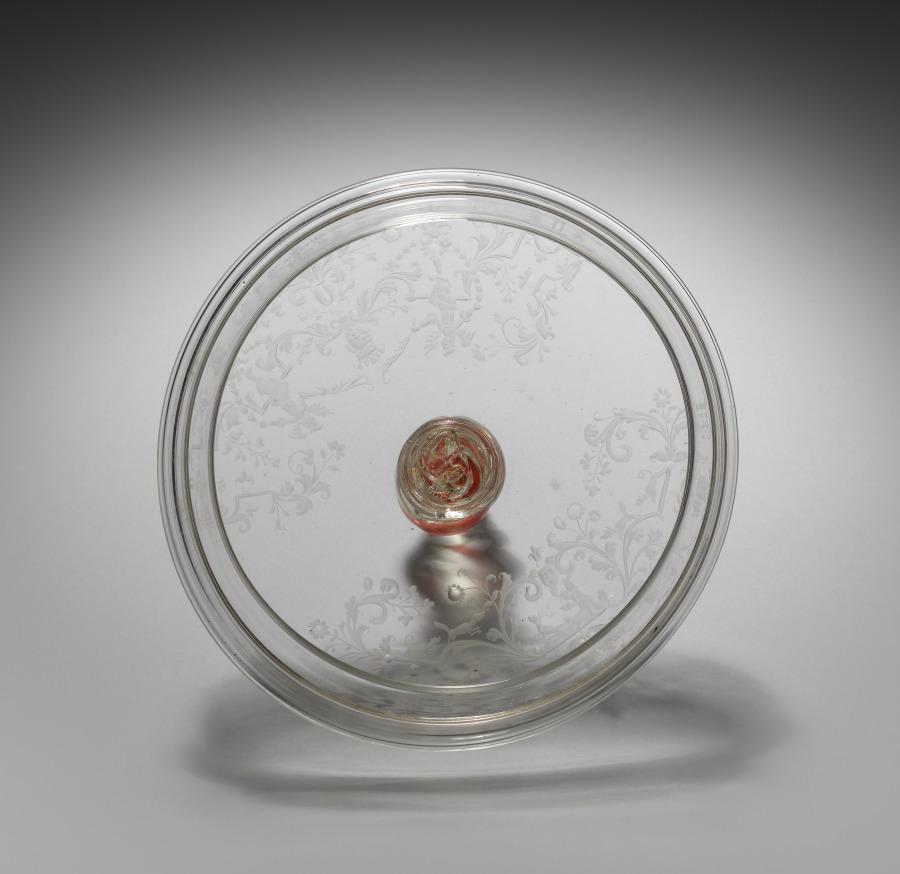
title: Cover for a Standing Cup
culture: Bohemia, 18th century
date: c. 1715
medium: glass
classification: Glass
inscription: the German inscription engraved around the hunting scene translates as: When sorrow torments us enjoy a glass of wine and also the joy of a hunt; engraved on the opposite side: F.A.K.J.P.V.C.F.Z.S. (Friedrich August Keonig in Polen und Chur Fuerst zu Sachsen).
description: Engraved with arms of Saxony-Poland and Hunting Scene.